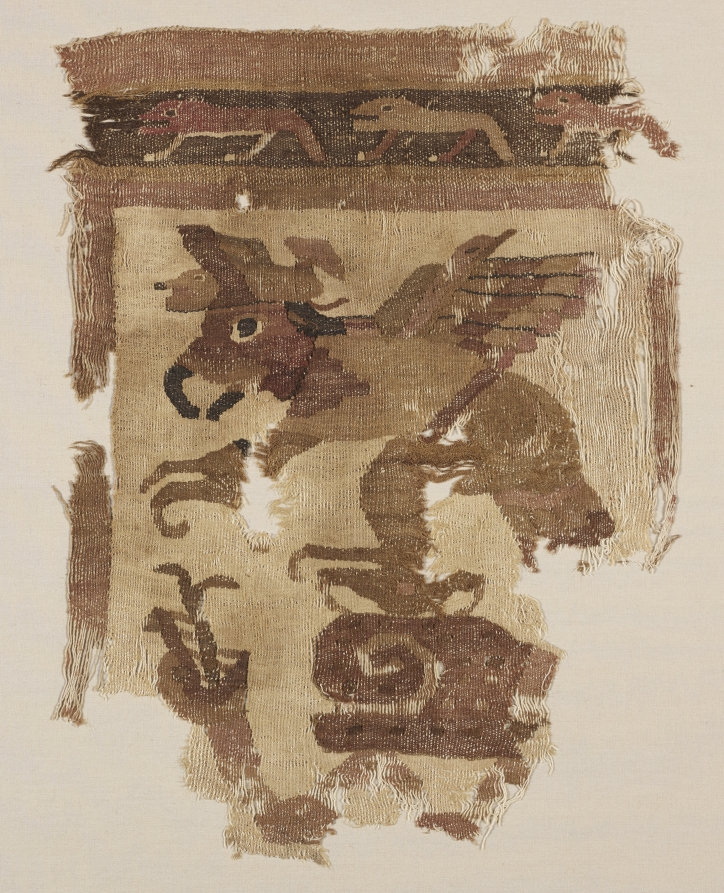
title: Textile Fragment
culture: Peru, Moche, north coast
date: c. 50–650 CE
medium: cotton and camelid fiber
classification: Textile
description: This fragment, one of several in the collection, is a rare survivor of catastrophic rains that destroyed much of the Moche textile legacy and may have helped to bring about the decline of Moche culture. It depicts a serpent and a snail beneath a hovering raptorial bird—perhaps a snail kite, a type of hawk named after its favored food. The size of the motifs implies that the original textile was large; a mantle (a shawl-like garment) or a hanging are among the possibilities.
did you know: This fragment is a rare survivor of floods that destroyed much of the Moche textile record.